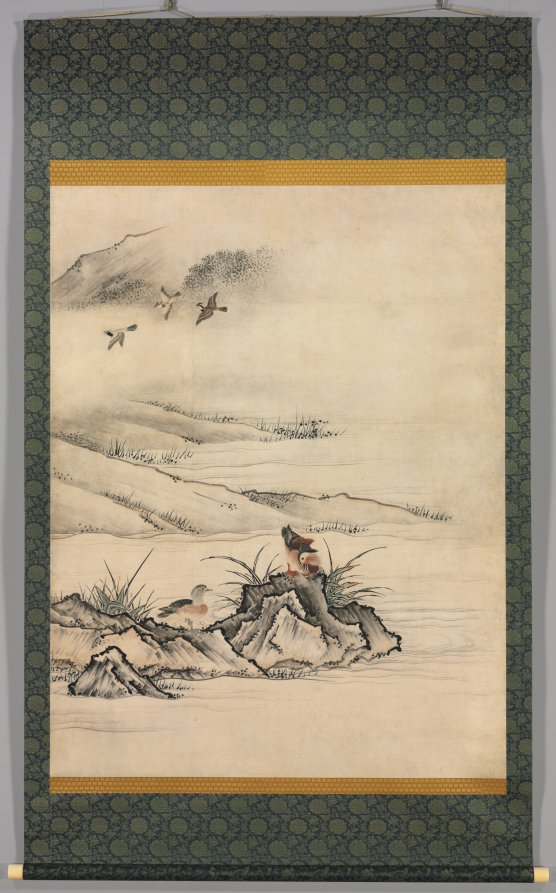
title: Flowers and Birds in a Spring Landscape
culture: Japan, Muromachi period (1392–1573)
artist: attributed to Kano Motonobu (Japanese, c. 1476–1559)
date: 1500s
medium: One of a set of sliding door panels mounted as hanging scrolls; ink and color on paper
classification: Painting